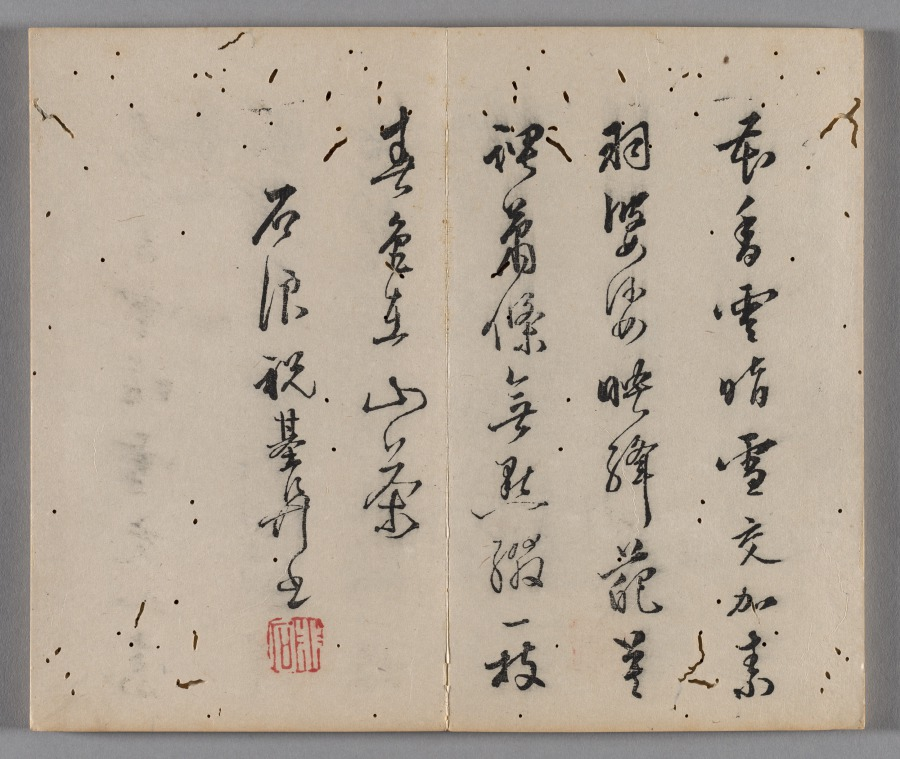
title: Ten Bamboo Studio Painting and Calligraphy Handbook (Shizhuzhai shuhua pu): Birds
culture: China, Qing dynasty (1644-1911)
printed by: Hu Zhengyan (Chinese, c. 1584–1674)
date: 1633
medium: Woodblock-printed book; ink and colors on paper; first edition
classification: Print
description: Color printing reached a level of perfection in the early 1600s, as seen in this Ten Bamboo Studio Collection of Calligraphy and Painting and the Mustard Seed Garden Manual of Painting (printed 1679 and 1701). The painterly quality, precision in registering (aligning) the woodblocks, and harmonious colors made them the most successful color print editions in Chinese history. Both editions were printed and compiled in Nanjing, spread nationwide, and had a great impact on the arts in Japan and Korea.